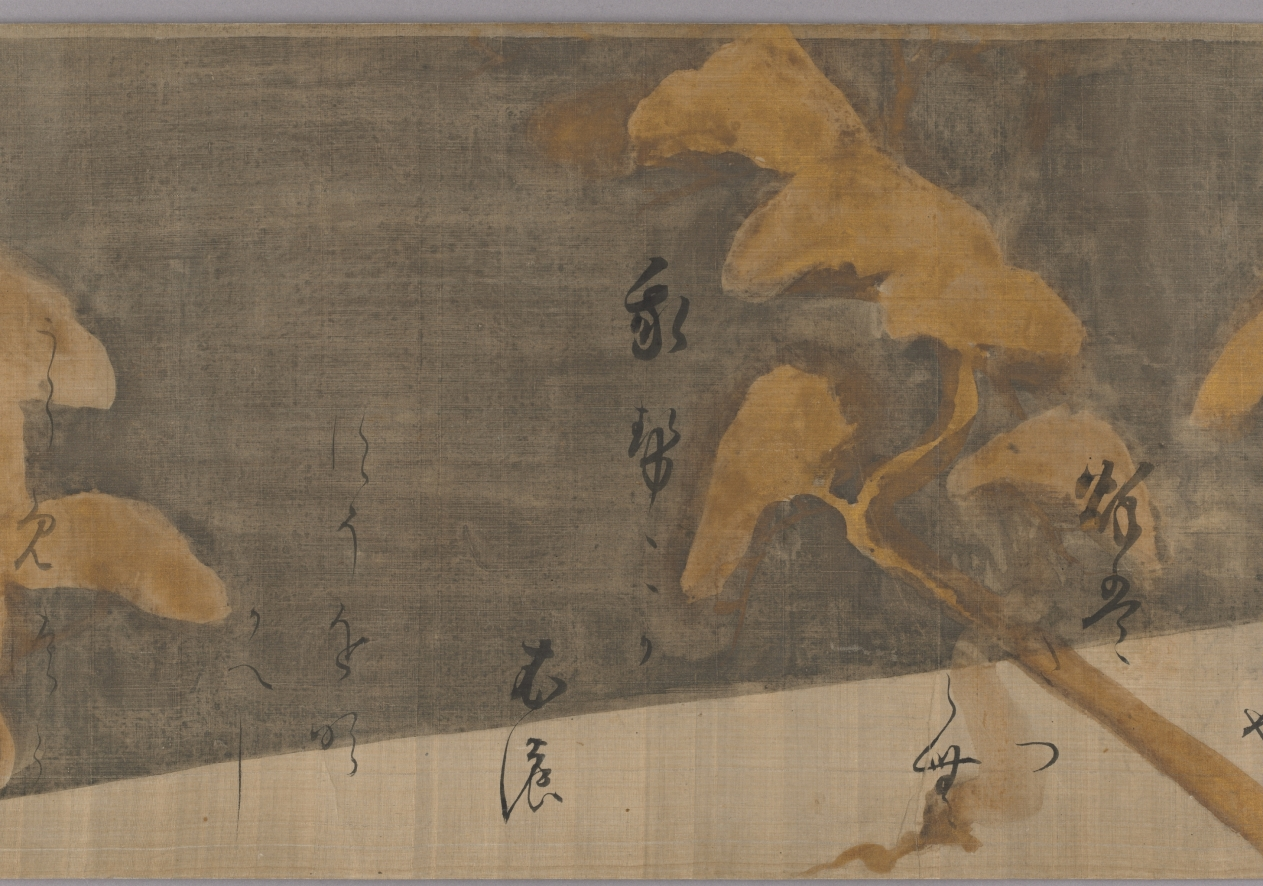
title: Selections from the Collection of Japanese Poems from Ancient and Modern Times (Kokin wakashū) with Design of Pines Along the Shore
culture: Japan, Momoyama period (1573-1615) to Edo period (1615-1858)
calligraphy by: Hon'ami Kōetsu (Japanese, 1558–1637)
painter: attributed to Tawaraya Sōtatsu (Japanese, c. 1570–c. 1640)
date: 1600s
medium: handscroll; ink on silk with gold and silver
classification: Calligraphy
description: The calligrapher and craftsman Hon’ami Kōetsu frequently collaborated with Tawaraya Sōtatsu, a painter who ran a studio that produced fans and screens. Sōtatsu’s work featured abstracted and flattened shapes, fields of color and gold, and asymmetry. In particular, motifs that appeared in small scale, such as flora and fauna, in early decorated Japanese papers were painted in a larger scale—blown up as if seen under a magnifying glass. For this handscroll, Kōetsu brushed poems from the autumn section of a poetry anthology onto silk with a landscape of pines in gold and silver likely painted by Sōtatsu.